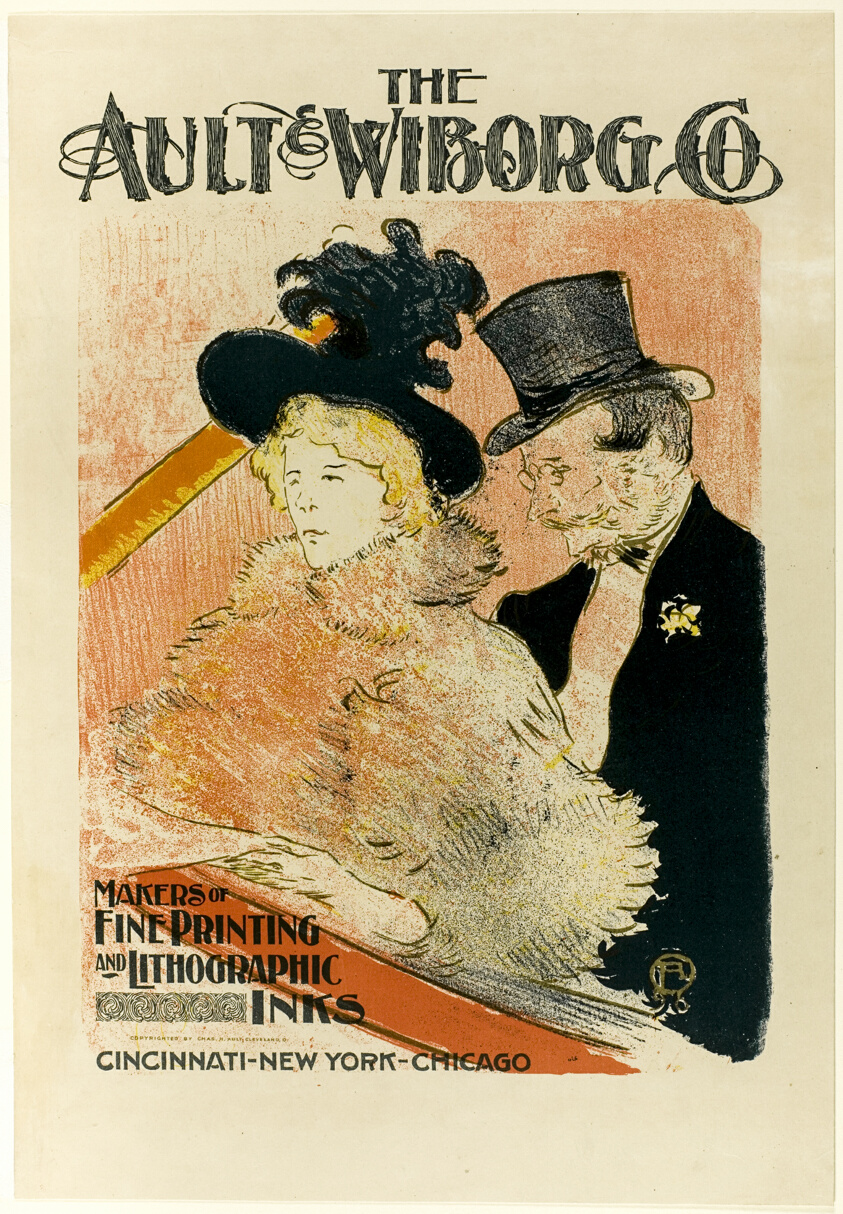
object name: Print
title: At the Concert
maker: Henri de Toulouse-Lautrec (French, 1864-1901)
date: 1896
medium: Color lithograph on cream wove paper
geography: France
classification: zincograph; print; prints and drawing